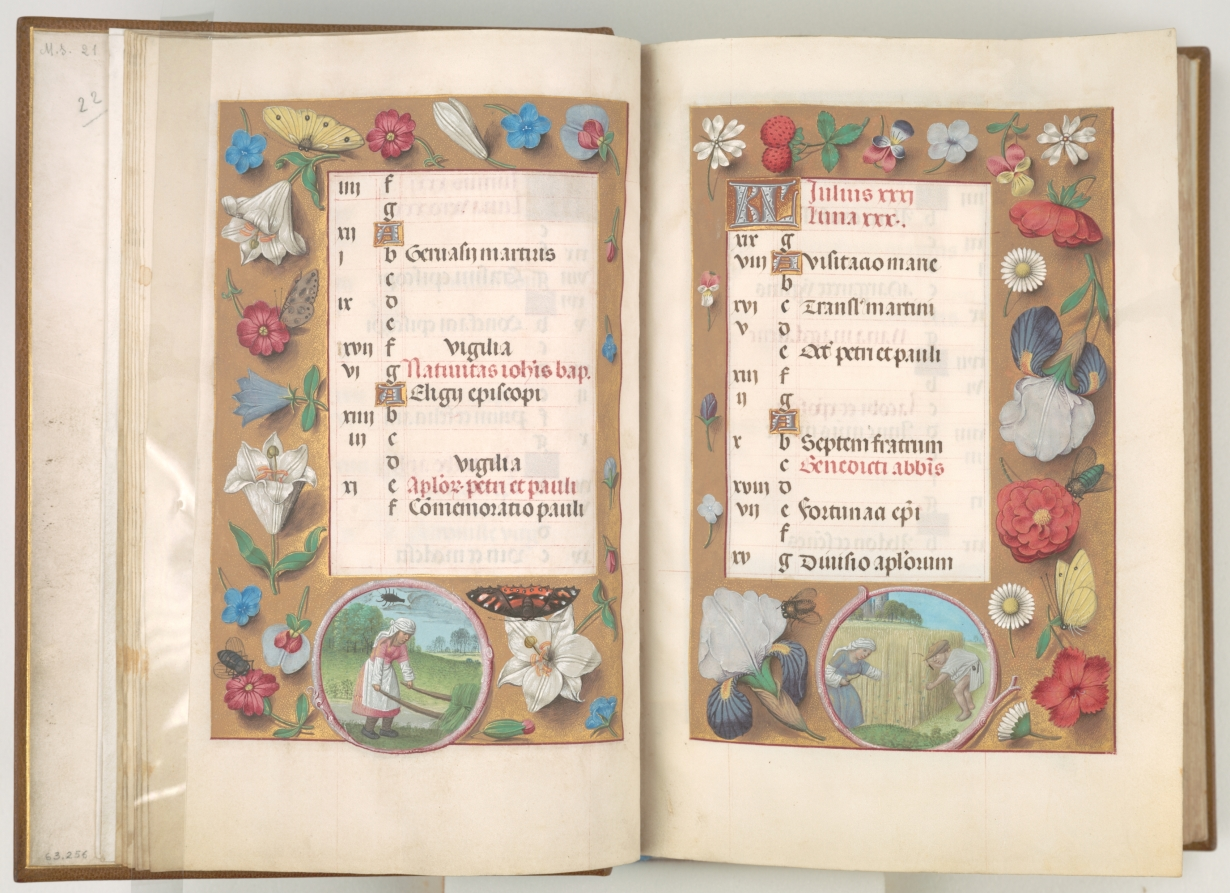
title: Hours of Queen Isabella the Catholic, Queen of Spain: Fol. 8r, July - Harvesting Wheat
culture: Flanders, Ghent and Bruges, late 15th century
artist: Master of the First Prayerbook of Maximillian (Flemish, c. 1444–1519)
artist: and Associates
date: c. 1500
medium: ink, tempera, and gold on vellum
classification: Bound Volume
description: A great lover of Flemish art, Queen Isabella treasured her many devotional books. This deluxe manuscript was created for her private devotions by highly organized and distinctly talented manuscript painters active in Ghent and Bruges. The Ghent-Bruges school represents the culmination of Flemish book painting, whose main features were the use of rich colors, illusionistic effects, a love of landscape, and a strong sense of visual narrative. Manuscripts produced by this circle of artists are renowned for their border decoration featuring a rich variety of realistically painted flowers, scrolling acanthus leaves, birds, and butterflies.